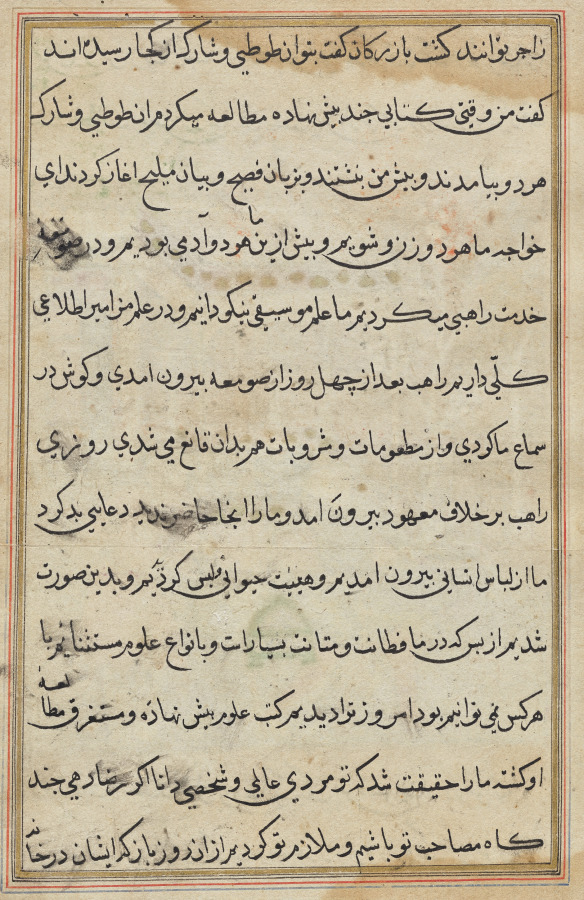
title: Page from Tales of a Parrot (Tuti-nama): text page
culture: Mughal India, court of Akbar (reigned 1556–1605)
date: c. 1560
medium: gum tempera, ink, and gold on paper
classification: Painting